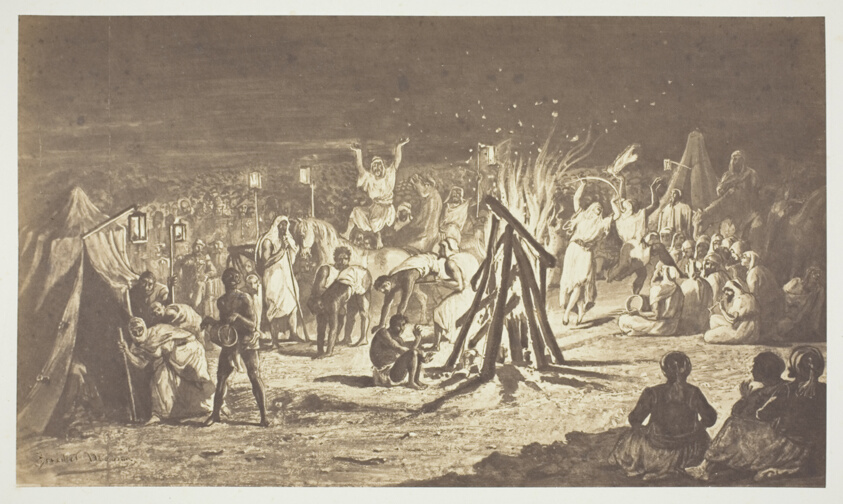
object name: Photograph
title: Untitled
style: 19th century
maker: Gustave Le Gray (French, 1820–1884)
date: 1857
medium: Albumen print, from the album "Souvenirs du Camp de Châlons"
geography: France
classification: albumen silver print; photographic process; photography; photograph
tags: Paris